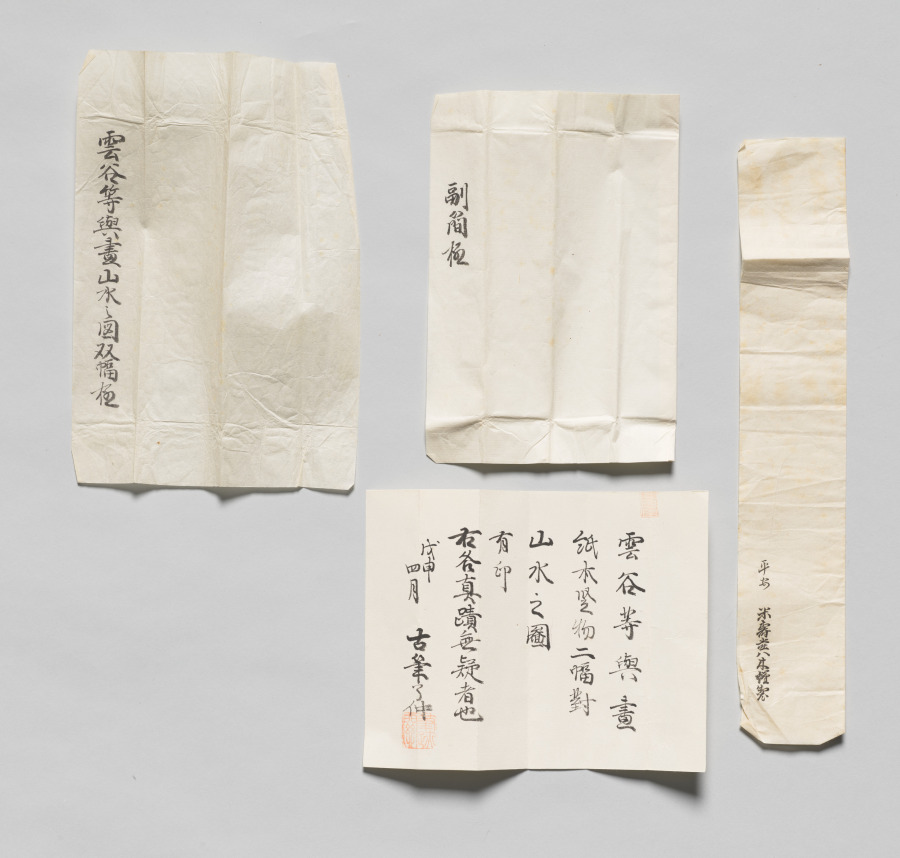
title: Landscapes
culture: Japan, Edo period (1615–1868)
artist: Unkoku Tōyo (Japanese, 1612–1688?)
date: mid- to late 1600s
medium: pair of hanging scrolls; ink and light color on paper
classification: Painting